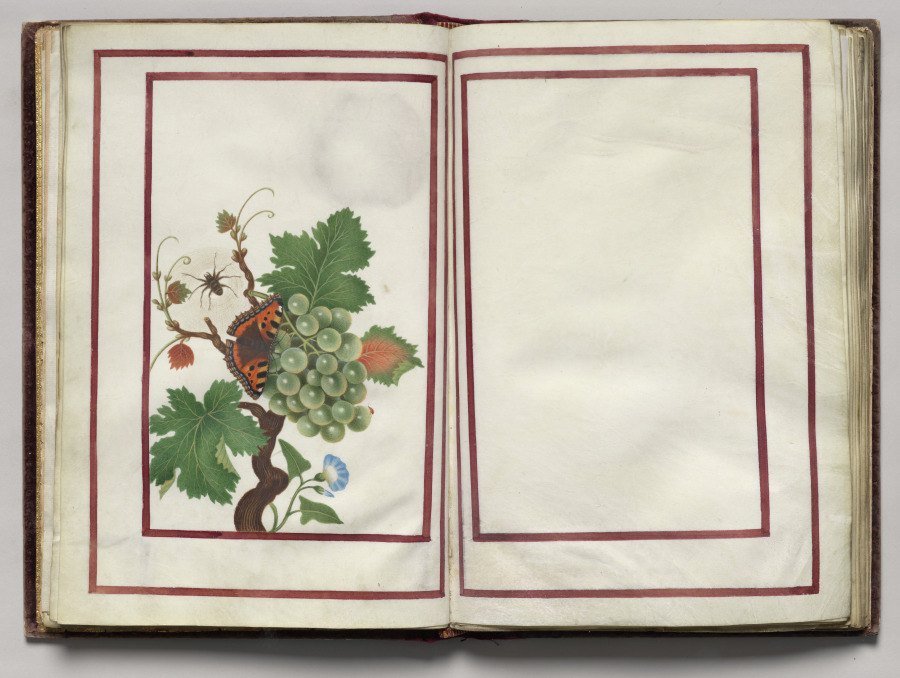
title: Border, folio 11 (recto), from Florilegium (A Book of Flower Studies)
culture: France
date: 1608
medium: watercolor, ink, silver and gold over occasional traces of pencil, on vellum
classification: Bound Volume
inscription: Dated: Poitiers 1608 (on frontispiece) Signed: On frontispiece in black ink, lower right: Van Kuyk Notation on drawing: Frontispiece: in pencil, lower margin: * élève de Van Kessel, peintre flammand (* in pencil also appears in front of Van Kuyk's name).